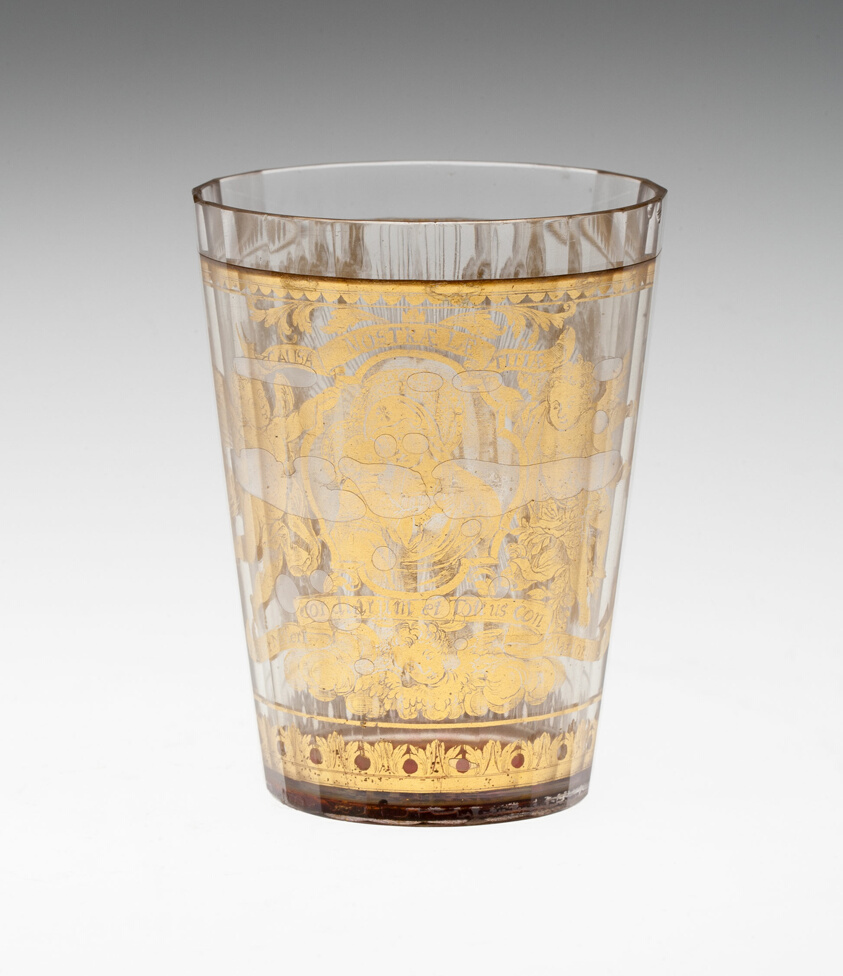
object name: Glass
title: Beaker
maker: Bohemia, Czech Republic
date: c. 1730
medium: Glass with engraved gold leaf decoration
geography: Bohemia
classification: drinking vessel; glass; european decorative arts